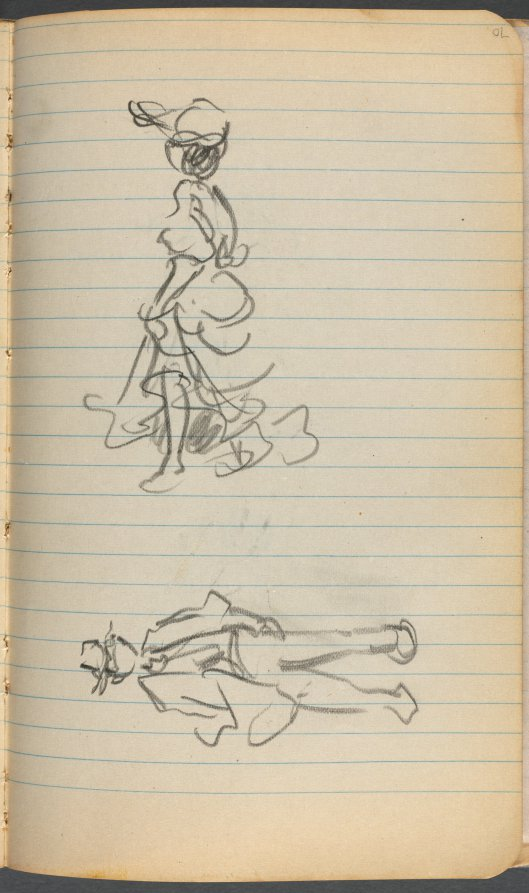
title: Sketchbook, page 070: Two Figures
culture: America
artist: Maurice Prendergast (American, born Newfoundland [now Canada], 1858–1924)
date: 1905–10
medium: graphite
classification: Bound Volume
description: This sketchbook contains 69 pages of drawings, a diary largely devoted to the state of the artist's health, and a three-page discourse on the nature of genius and ideas.